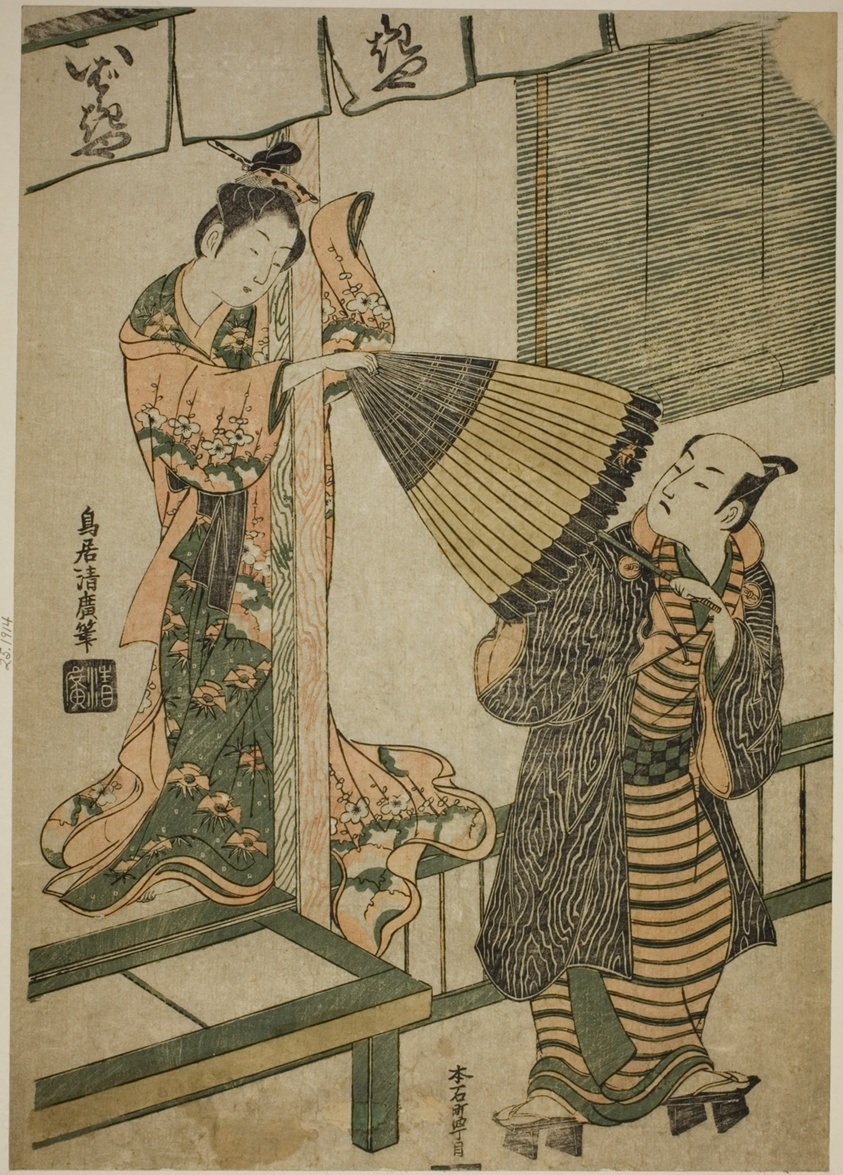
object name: Print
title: Beauty of Ibarakiya Pulling at a Man's Umbrella - a Parody of the Legend of Watanabe no Tsuna and the Ibaraki Demon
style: Japanese (culture or style)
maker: Torii Kiyohiro (Japanese, active c. 1737-76)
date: c. 1759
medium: Color woodblock print; oban, benizuri-e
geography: Japan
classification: woodblock print; print; asian art